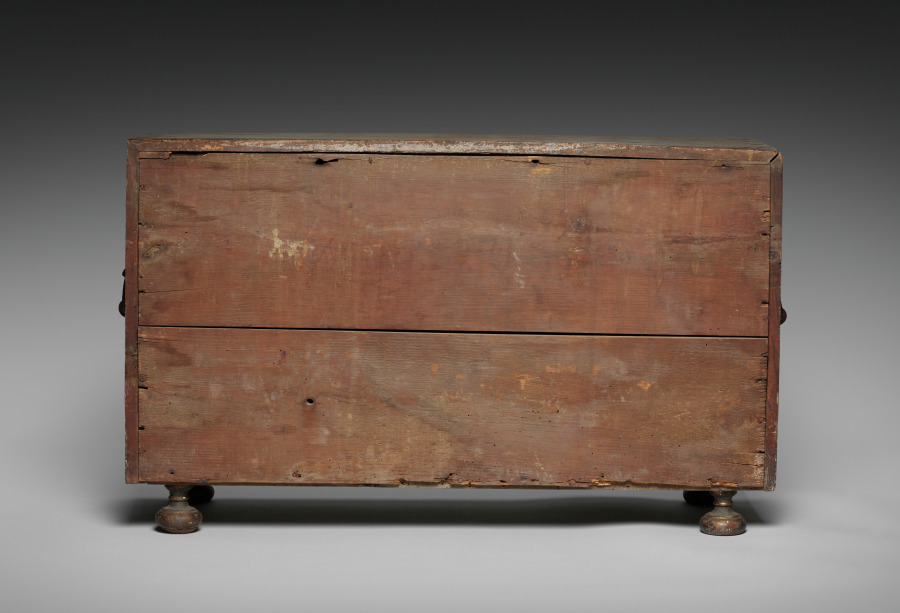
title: Chest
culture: Spain, Colonial, late 17th Century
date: late 1600s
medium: turned and joined wood, gilded and painted red with applied bone columns and bone inlays, wrought iron hardward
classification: Furniture and woodwork